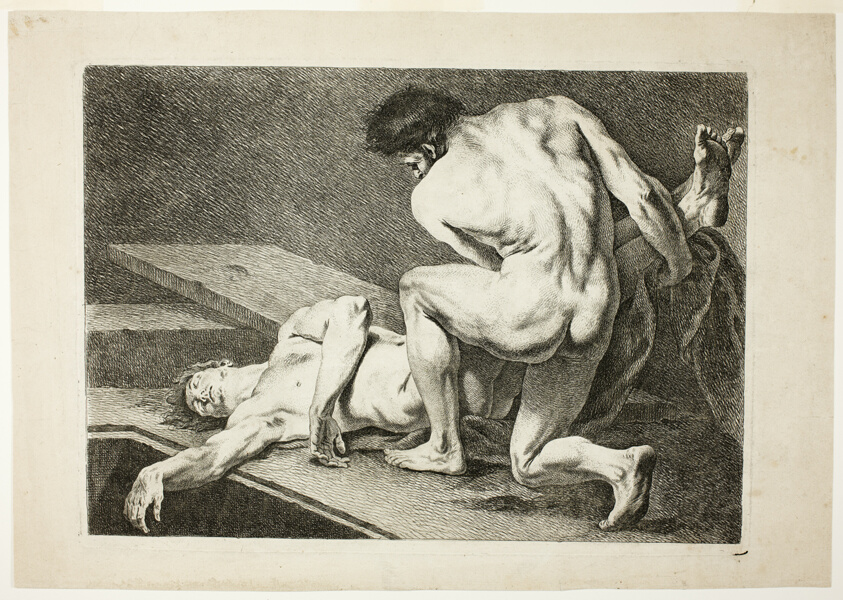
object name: Print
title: Figure, from Six Figures Académiques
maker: Carle Vanloo; French, 1705-1765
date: 1742-43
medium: Etching on cream laid paper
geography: France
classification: etching; print; prints and drawing